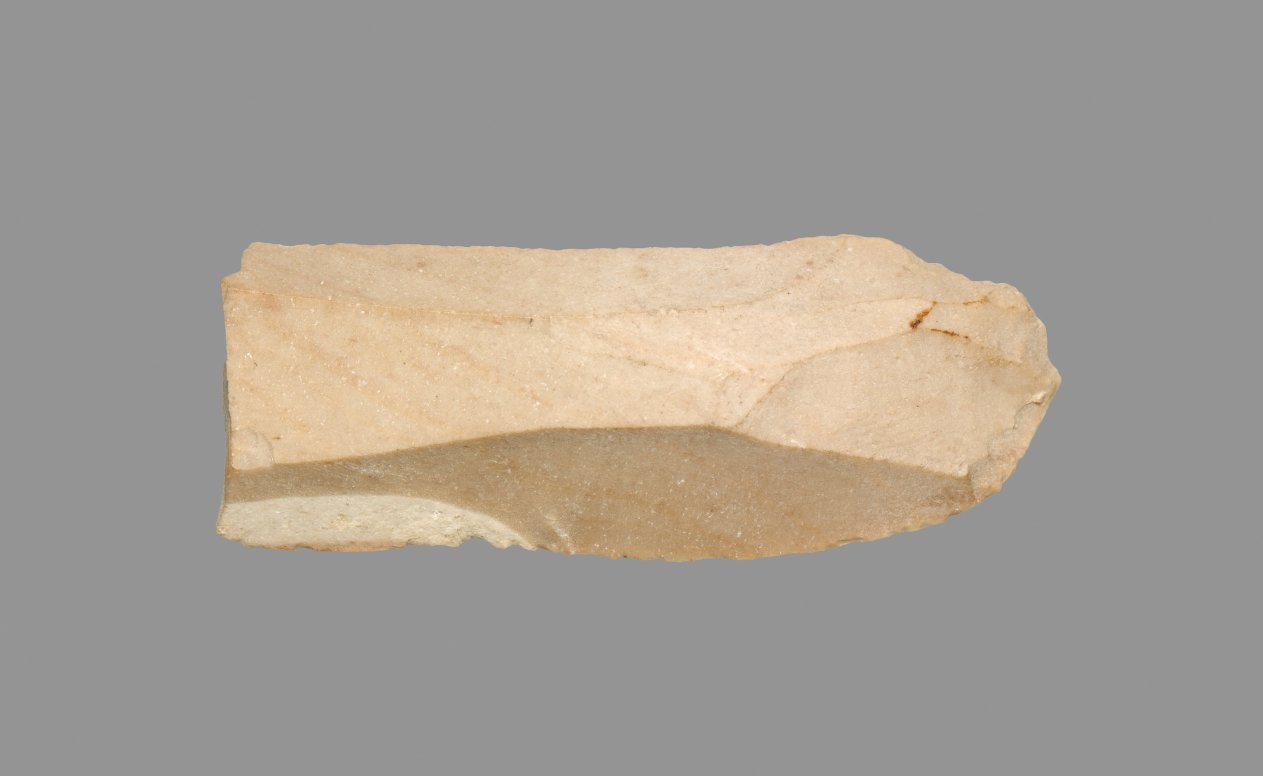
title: Sickle Blade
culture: Egypt, Middle Kingdom (2040–1648 BCE), Dynasty 12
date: 1980–1801 BCE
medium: flint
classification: Implements